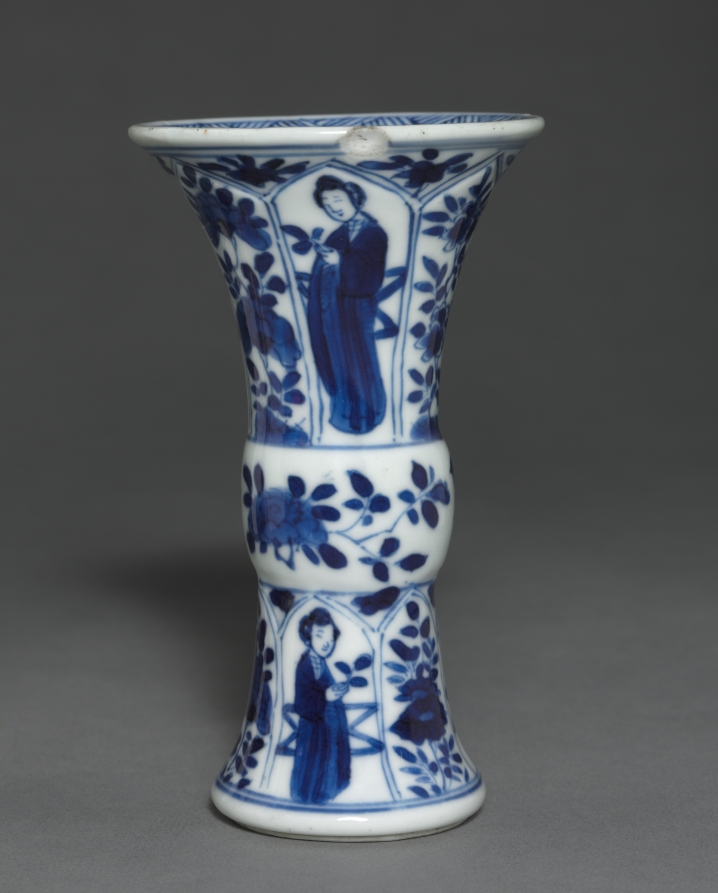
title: Beaker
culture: China, Qing dynasty (1644-1911), Daoguang reign (1821-1850) - Xianfeng reign (1851-1861)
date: 19th Century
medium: porcelain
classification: Ceramic